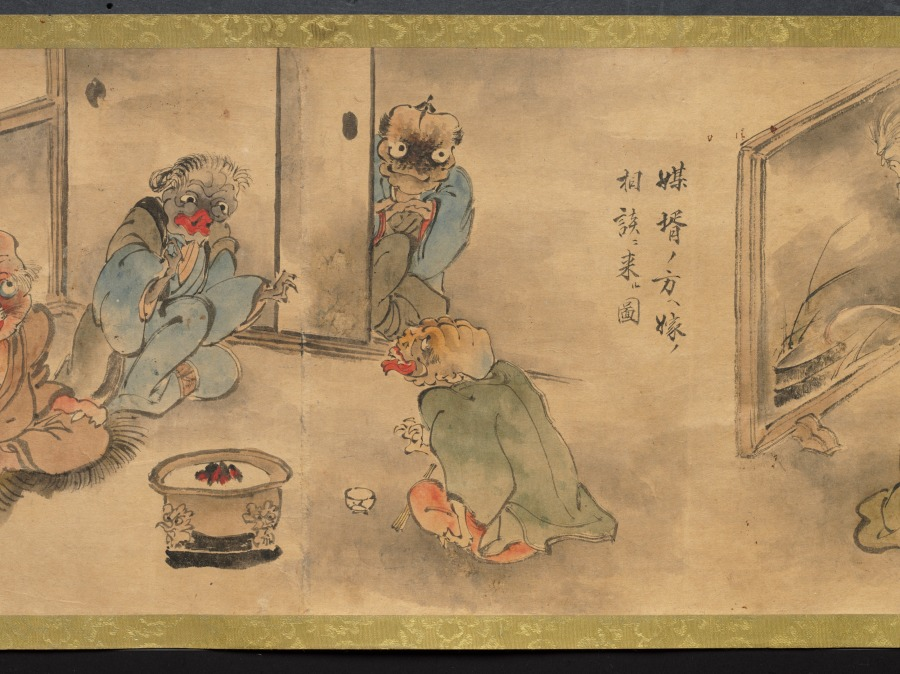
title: An Illustrated Marriage of Apparitions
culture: Japan, Edo period (1615–1868)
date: mid-1800s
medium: handscroll; ink and color on paper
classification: Painting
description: The matchmaking, engagement, wedding, and birth of the first child of two apparitions, or bakemono, literally "things that change," are illustrated in this whimsical, humorous handscroll. Japanese folklore abounds with such strange creatures, most famously represented in handscrolls featuring a procession of 100 supernatural monsters. Aside from a textual preface and cartouches indicating the content of the scenes, the tale is told visually. The artist and whereabouts of the original handscroll are unknown, but a number of other 19th-century copies by amateur painters exist in Japanese collections, attesting to its broad appeal.